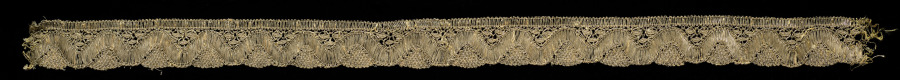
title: Bobbin Lace Edging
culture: Russia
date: 1800s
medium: lace, bobbin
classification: Lace